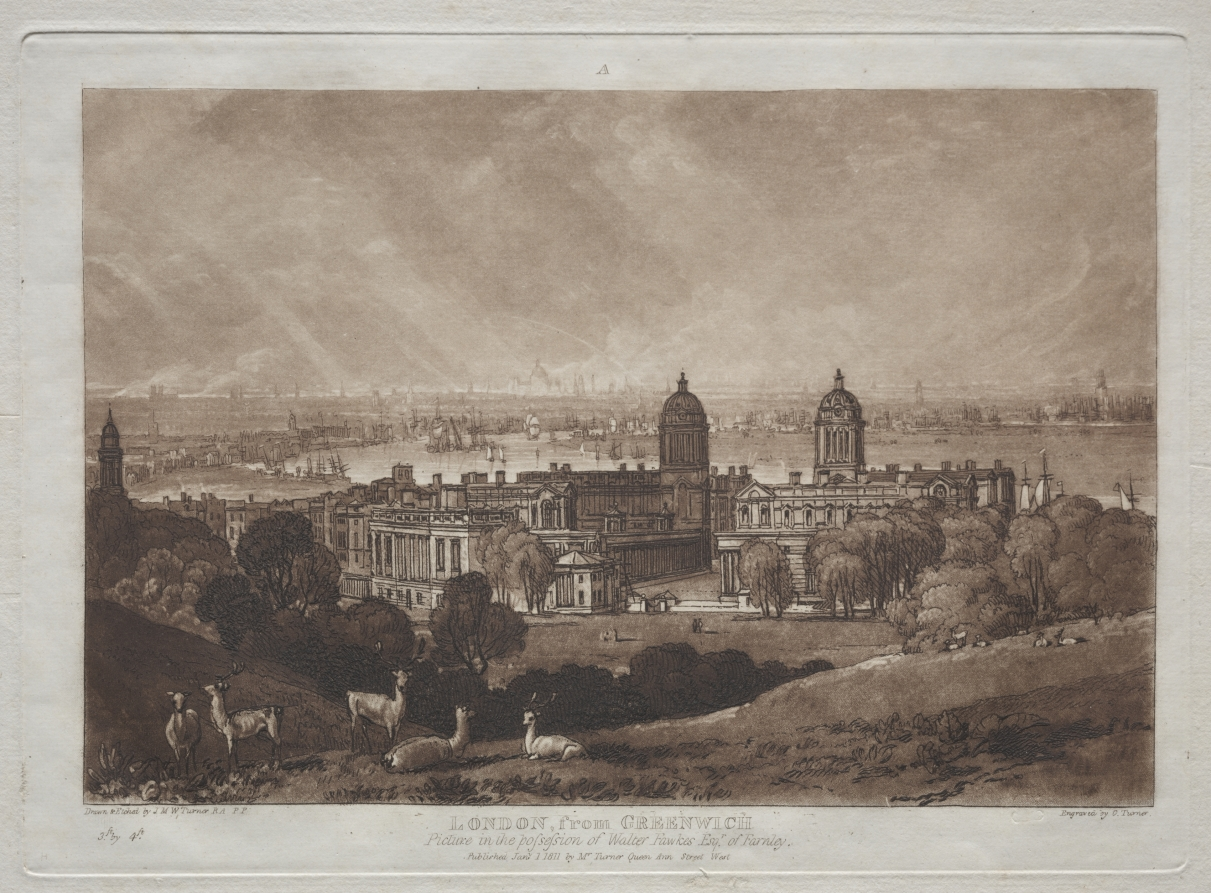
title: London from Greenwich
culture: England, 19th century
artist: Joseph Mallord William Turner (British, 1775–1851)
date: 1811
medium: etching and mezzotint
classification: Print